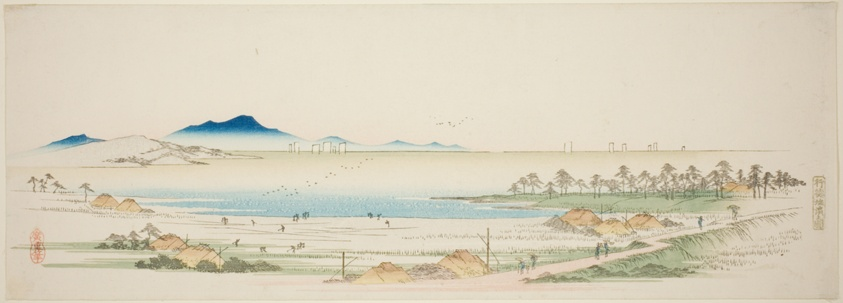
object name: Print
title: Salt Beach at Gyotoku (Gyotoku shiohama no zu), from an untitled series of famous views of the Edo suburbs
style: Japanese (culture or style)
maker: Utagawa Hiroshige 歌川 広重; Japanese, 1797-1858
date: c. 1839/40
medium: Color woodblock print; ebangire, surimono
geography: Japan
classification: woodblock print; print; asian art